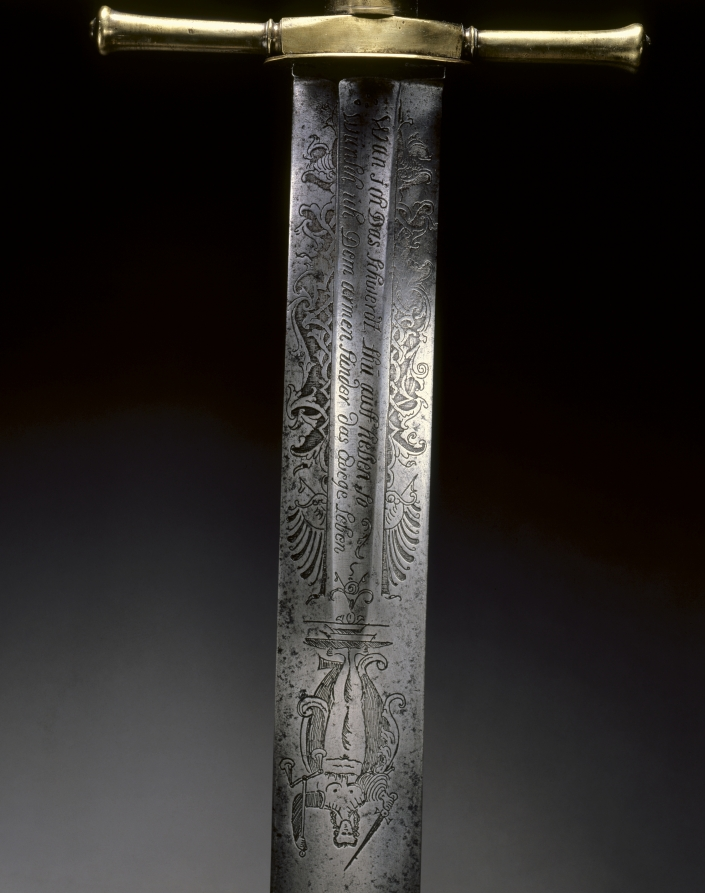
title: Executioner's Sword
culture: Germany, late 17th Century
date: late 1600s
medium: steel, wood, brass and copper wire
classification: Arms and Armor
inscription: Wan ich Das Schwerdt thu auff heben so / Wunch ich Dem armen sunder das Ewege Leben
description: Execution by decapitation was generally reserved for the nobility during the Middle Ages and Renaissance. Although the axe was favored in England, for centuries swords were used throughout Central Europe. The blades were often etched with moralizing inscriptions and designs representing Justice (as here), the gallows, the rack, or the Crucifixion. By the early 1700s swords were no longer primarily used in Europe for executions, but they still functioned as symbols of power. This sword was probably ceremonial for a formal procedure or procession.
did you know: The inscription on this sword reads, "When I raise this sword, so I wish that this poor sinner will receive eternal life."